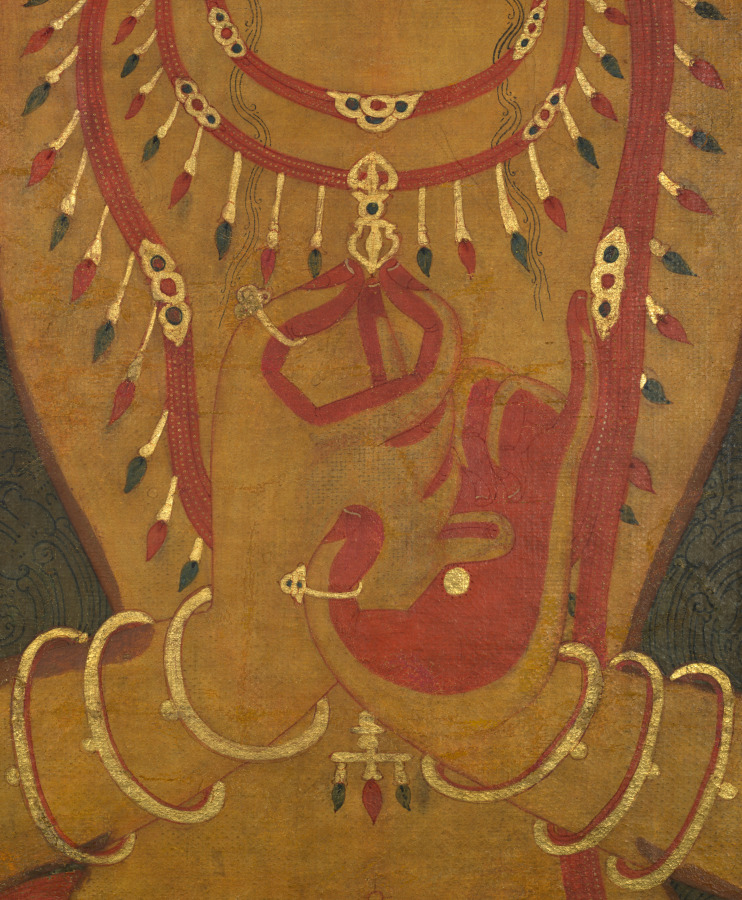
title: Tantric Buddha Vairochana as Vajrasattva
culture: Central Tibet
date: c. 1150–1200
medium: gum tempera, ink, and gold on cloth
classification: Painting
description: The seated Buddha dominating the composition is identified as Vairochana because of his hand gesture, the mudra communicating supreme enlightenment in which the index finger of one hand is grasped by the fingers of the opposite hand. His golden color and the tiny vajra—a six-pronged ritual object representing a thunderbolt—balanced on top of his finger suggest that he is in the guise of Vajrasattva, the summation of all enlightened beings. In his crown is the image of a monk, who is probably the guru of the donor, the small monastic figure at the lower right next to the lotus pedestal.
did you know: A mantra written behind the figures invokes their living presence in the thangka painting.